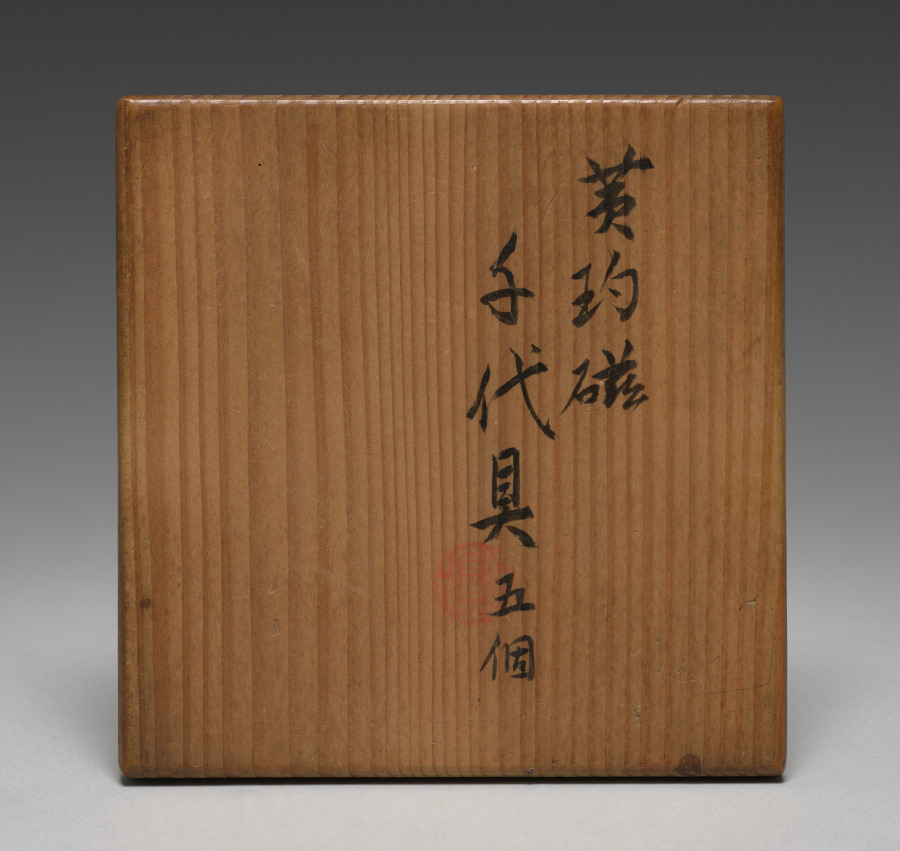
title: Cups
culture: Japan, Taishō period (1912–26) or Shōwa period (1926–89)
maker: Seifū Yohei IV (Japanese, 1872–1951)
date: 1914–46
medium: Set of five cups; porcelain with yellow glaze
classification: Ceramic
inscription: 清風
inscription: 清風造 【印】成山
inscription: 清風盧人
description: Like his father, Yohei IV also produced works with red or yellow monochrome glazes. His yellow-glazed works include this set of five drinking cups, a pair of sake pourers CMA 2022.216, and a sweets bowl molded into the shape of a chrysanthemum CMA 2022.218.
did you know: Seifū Yohei IV learned the ceramics industry from his father and painting from Tanomura Shosai.